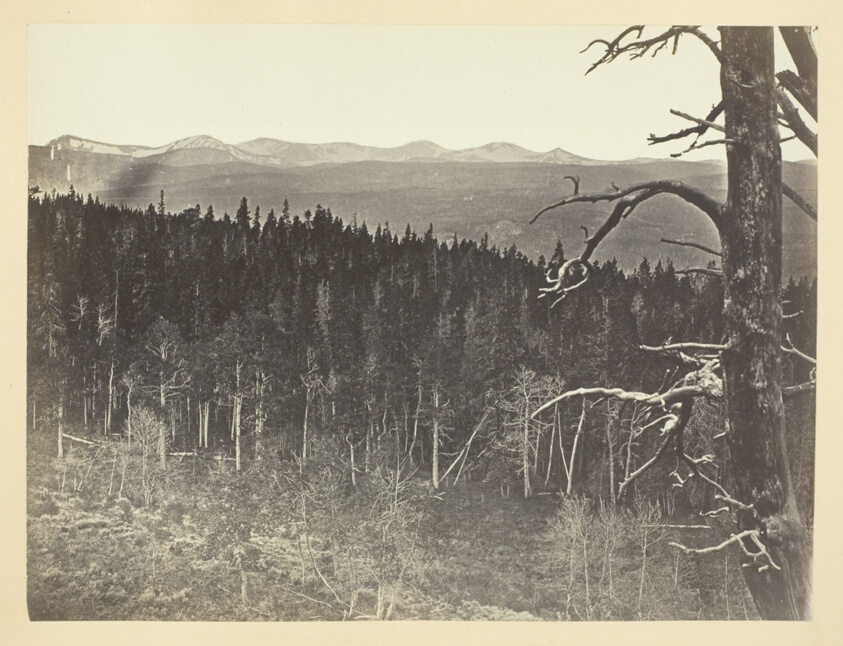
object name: Photograph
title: Snow and Timber Line, Medicine Bow Mountain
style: 19th century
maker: Andrew J. Russell; American, 1830–1902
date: 1868/69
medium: Albumen print, pl. VII from the album "Sun Pictures of Rocky Mountain Scenery" (1870)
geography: United States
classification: photograph; albumen silver print; photography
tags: Collected by Hugh Edwards, landscapes